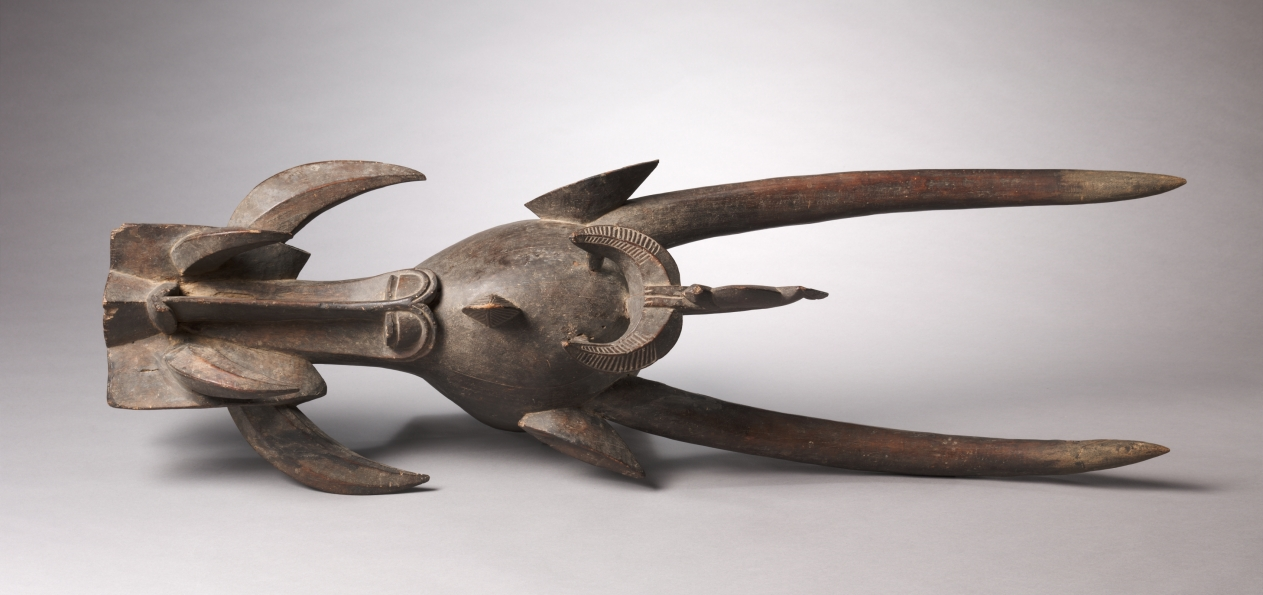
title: Helmet Mask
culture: Western Sudan, Ivory Coast, Senufo, 20th century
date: early to mid-1900s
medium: wood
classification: Mask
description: The iconography of this helmet mask is comprised of sculpted renderings of different animal attributes including a ram's horns, a warthog's tusks, a crocodile's mouth, and a hyena's snout. Carved between the long antelope horns is a miniature chameleon that holds an abstract wing-shaped motif called mangele. Intended to impress and terrify, the sculpture's fearsome aesthetic alludes to the mask's power as an anti-sorcery device.